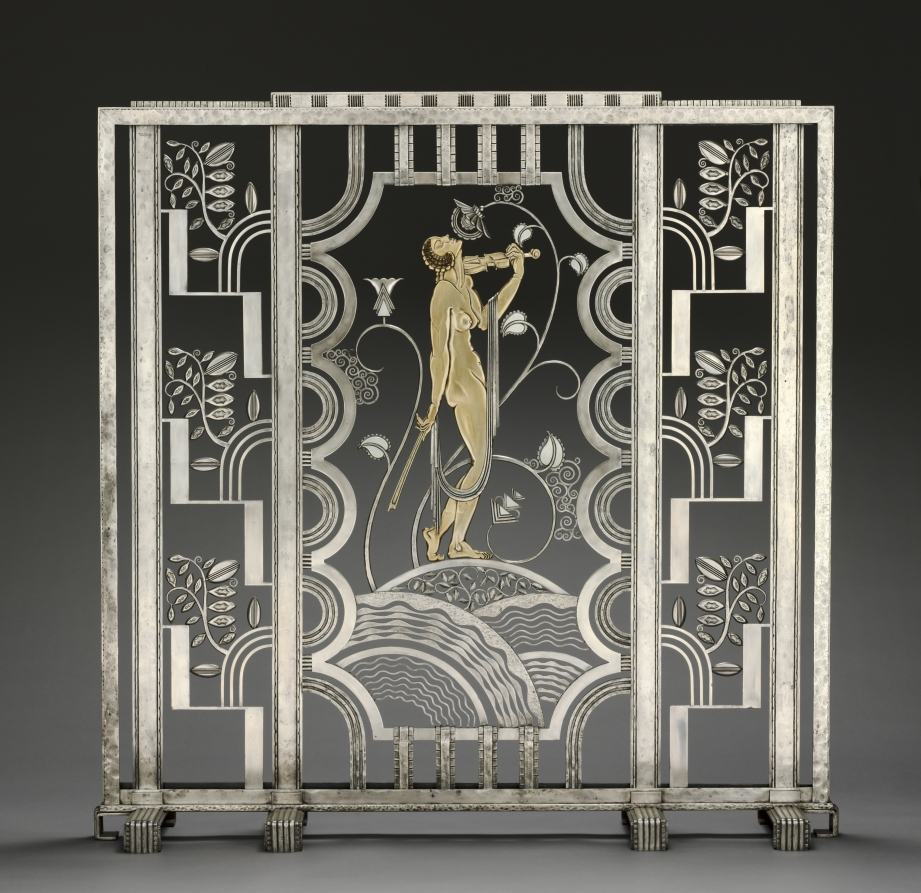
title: Muse with Violin Screen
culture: America, Ohio, Cleveland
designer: Paul Fehér (American, born Hungary, 1898–1990)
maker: Rose Iron Works (America, Ohio, Cleveland, est. 1904)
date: 1930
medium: Steel, brass; silver and gold plating, cotton velveteen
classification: Metalwork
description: Since the early years of the 20th century, the Rose Iron Works, a Cleveland supplier of architectural ornament, has produced distinguished metalwork. The company’s founder, Martin Rose, was born in Austria-Hungary and studied ornamental metalsmithing in Vienna prior to immigrating to Cleveland in 1902. In the 1920s, he hired a talented young Parisian designer, Paul Fehér, to work for the firm. Fehér’s designs, culminating in this massive screen, brought a modern European sensibility to the Rose Iron Works production. With its geometric patterning, highly stylized and abstracted natural forms, and the central figure reminiscent of the celebrated jazz singer Josephine Baker, this screen reflects the classic motifs of Art Deco design.